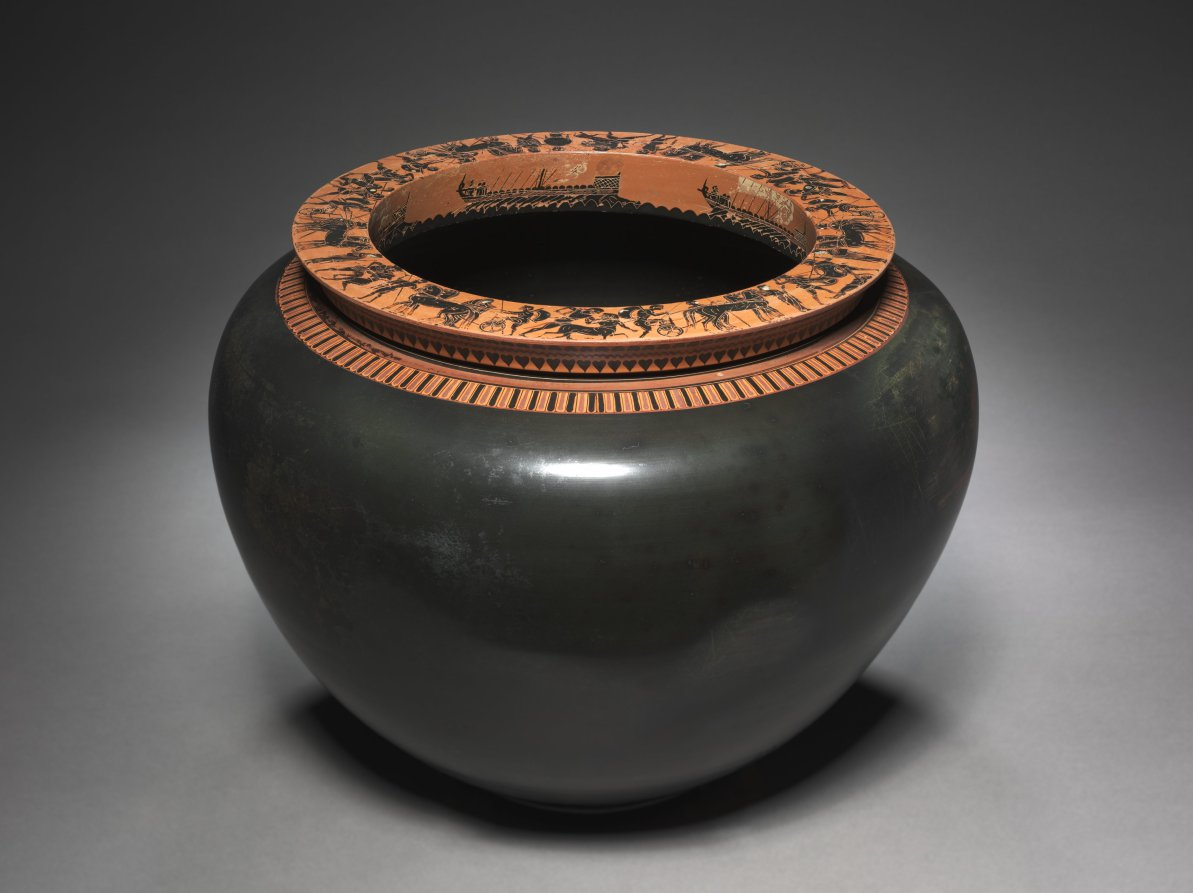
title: Black-Figure Dinos (Mixing Vessel): Warships (Int.); Heroic Scenes (Top)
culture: Greek, Attic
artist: circle of Antimenes Painter (Greek, Attic, active c. 530–510 BCE)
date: c. 520–515 BCE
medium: ceramic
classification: Ceramic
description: Designed for use at a symposium, or drinking party, this large dinos has a wide mouth allowing easy access to its contents—wine mixed with water (and sometimes other ingredients for flavoring). While drinking, symposiasts would often recite poetry and celebrate the mythological exploits of gods and heroes, perhaps prompted by the images painted on their pottery. Here, the vase-painter clearly anticipated such use; when the vessel was full, the ships painted on the inside of the rim would appear to sail across the “wine-dark sea” (to borrow a phrase found frequently in Homer’s Iliad and Odyssey). Other heroic scenes, including Herakles wrestling the Nemean lion and Theseus battling the Minotaur, appear on top of the rim, interspersed with chariots and anonymous combats.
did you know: Unable to stand on its own, this round-bottomed vessel probably once had a separately made base.